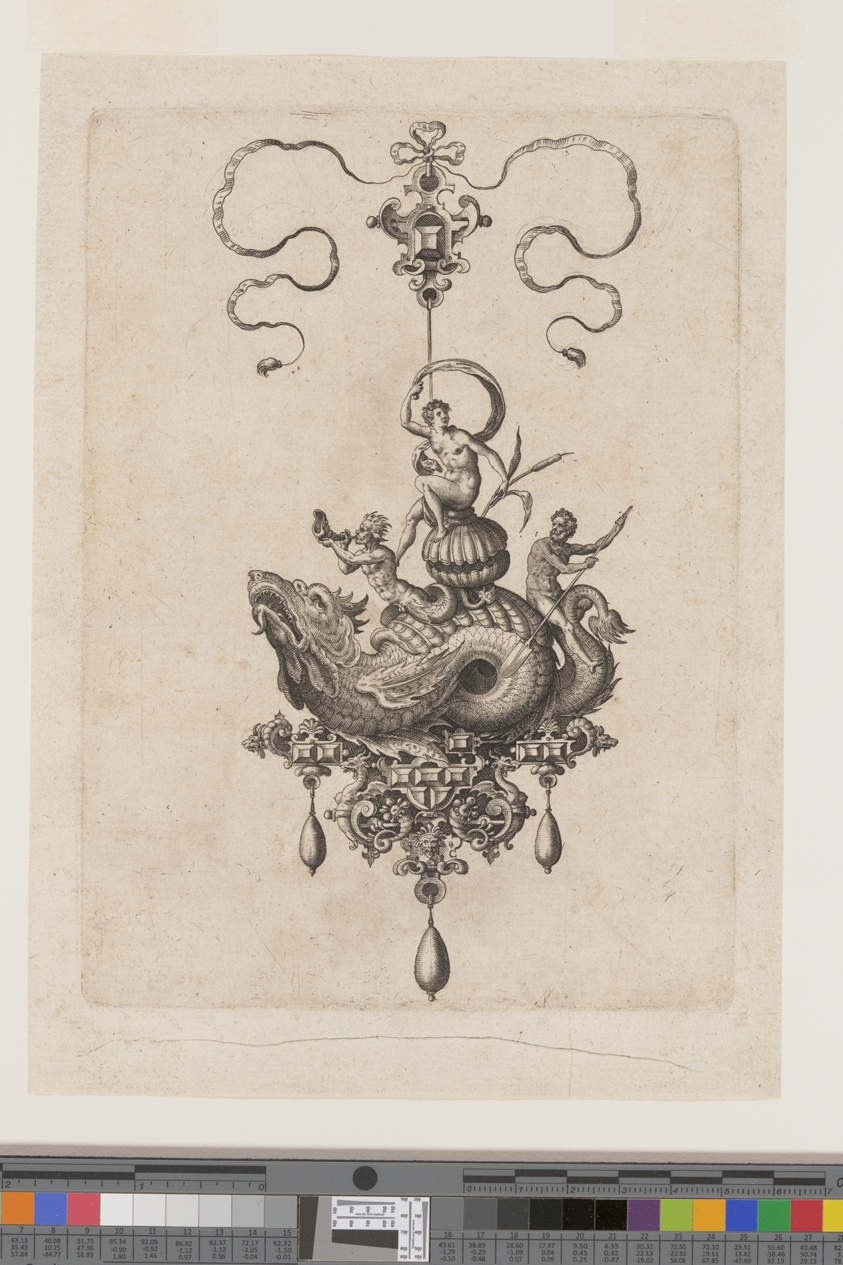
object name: Print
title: Renaissance Jeweled Pendant Sea Monsters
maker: Adriaen Collaert (Flemish, c. 1560–1618); after Hans Collaert (Flemish, c. 1530–1581)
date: 1582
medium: Engraving on ivory laid paper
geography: Flanders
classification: engraving; paper; print; prints and drawing